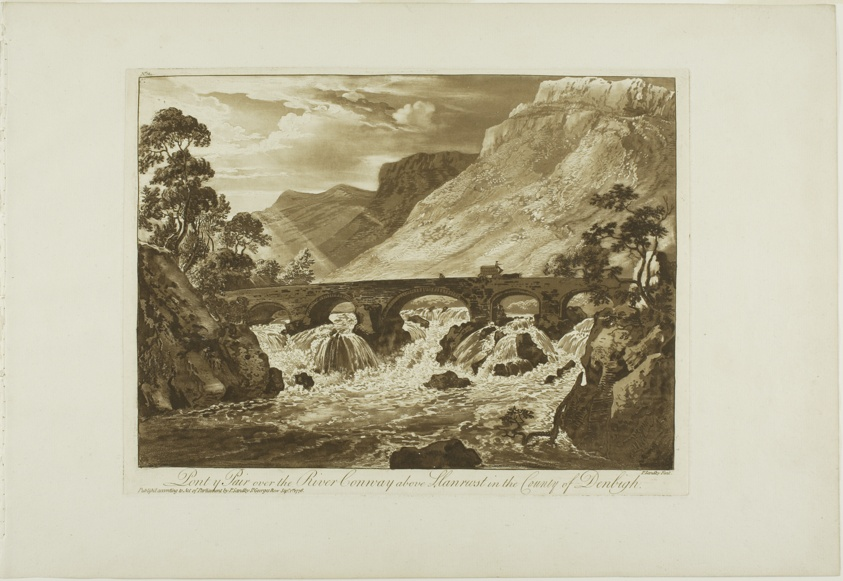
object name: Print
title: Pont y Pair over the River Conway above Llanrwst in the County of Denbigh, plate twelve from Twelve Views in North Wales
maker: Paul Sandby (English, 1731-1809)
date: 1776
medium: Aquatint with etching on ivory laid paper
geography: England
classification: etching; print; prints and drawing